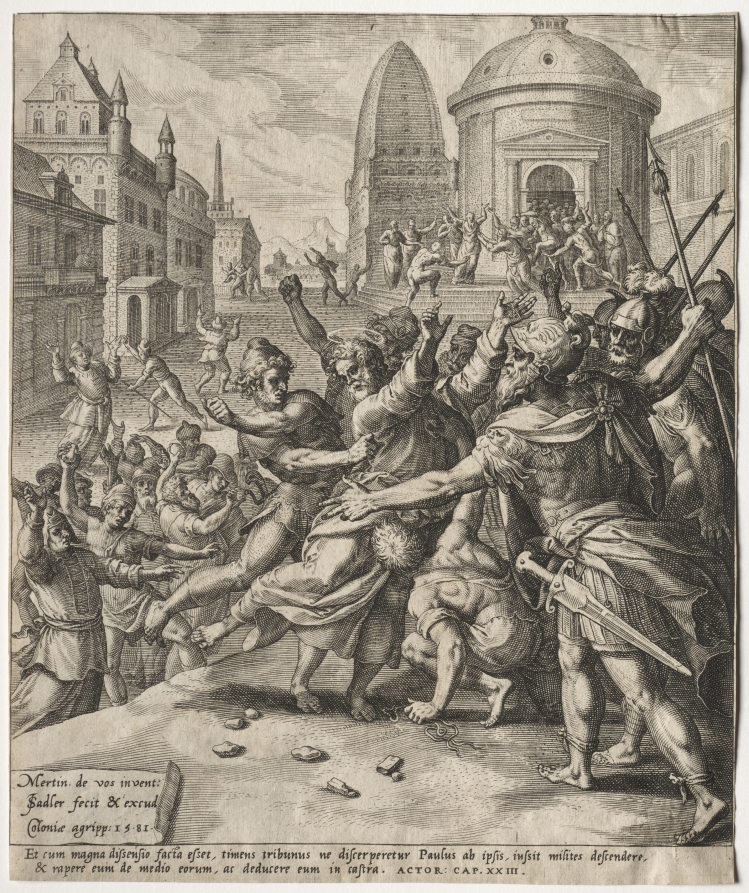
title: The Arrest of St. Paul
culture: Flanders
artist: Jan I Sadeler (Flemish, 1550–1600)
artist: after Maarten de Vos (Flemish, 1532–1603)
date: 1581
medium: engraving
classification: Print